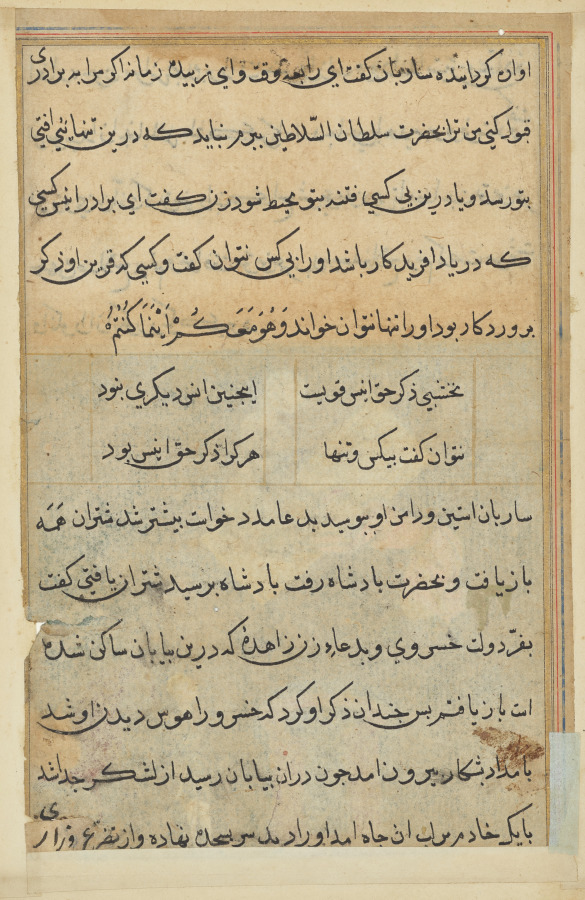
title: Page from Tales of a Parrot (Tuti-nama): text page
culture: Mughal India, court of Akbar (reigned 1556–1605)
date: c. 1560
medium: gum tempera, ink, and gold on paper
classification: Painting